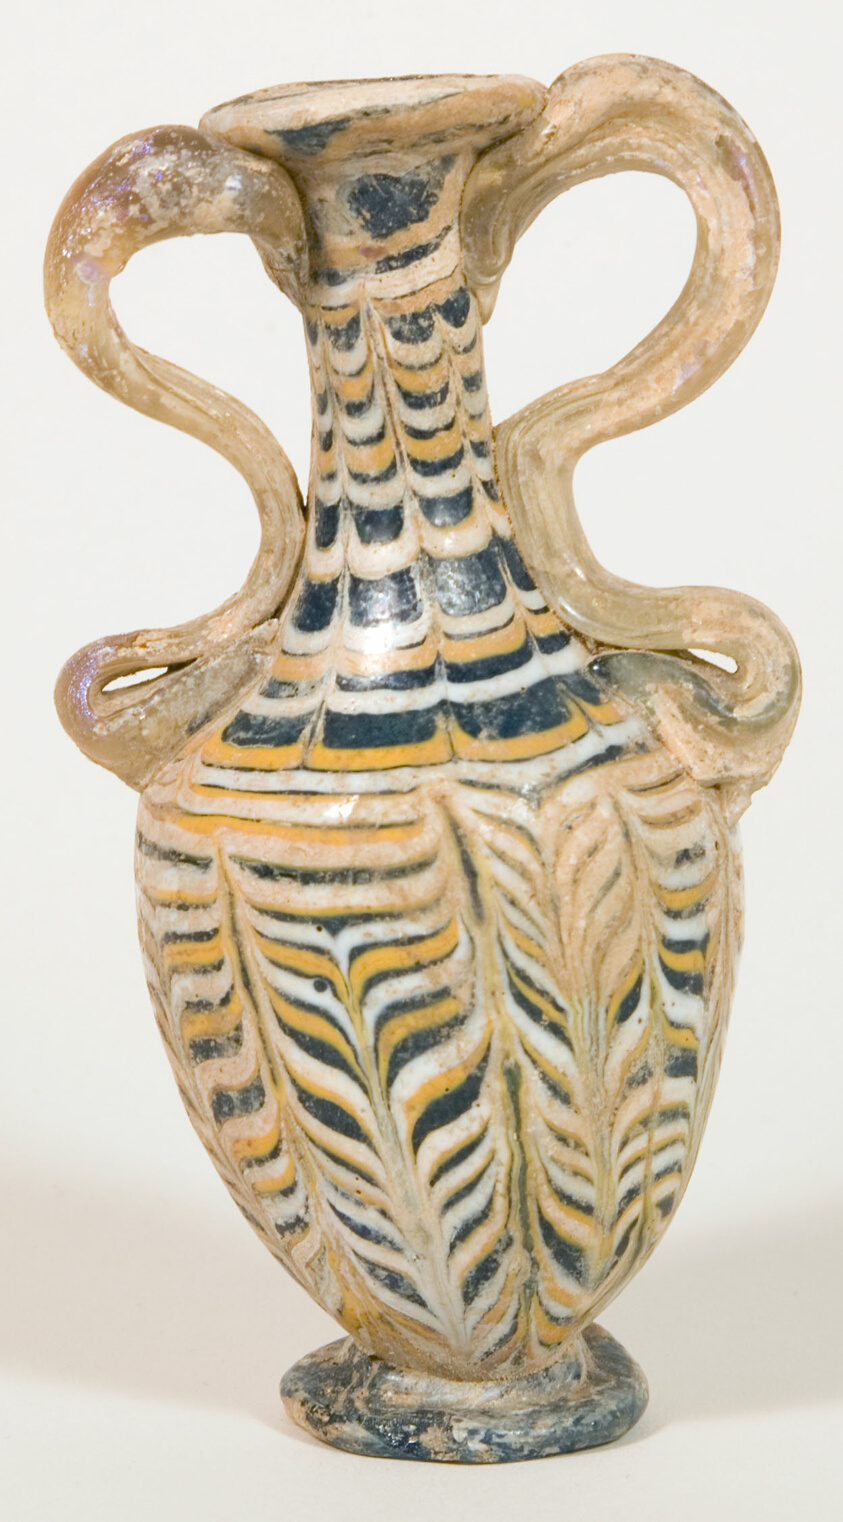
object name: Vessel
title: Amphoriskos (Container for Oil)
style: third intermediate period, late period (egyptian)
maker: Eastern Mediterranean; possibly the Syro-Palestinian region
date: 2nd-mid–1st century BCE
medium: Glass, core-formed technique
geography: Eastern Mediterranean Region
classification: container; amphoriskos; glass; vessel; ancient art